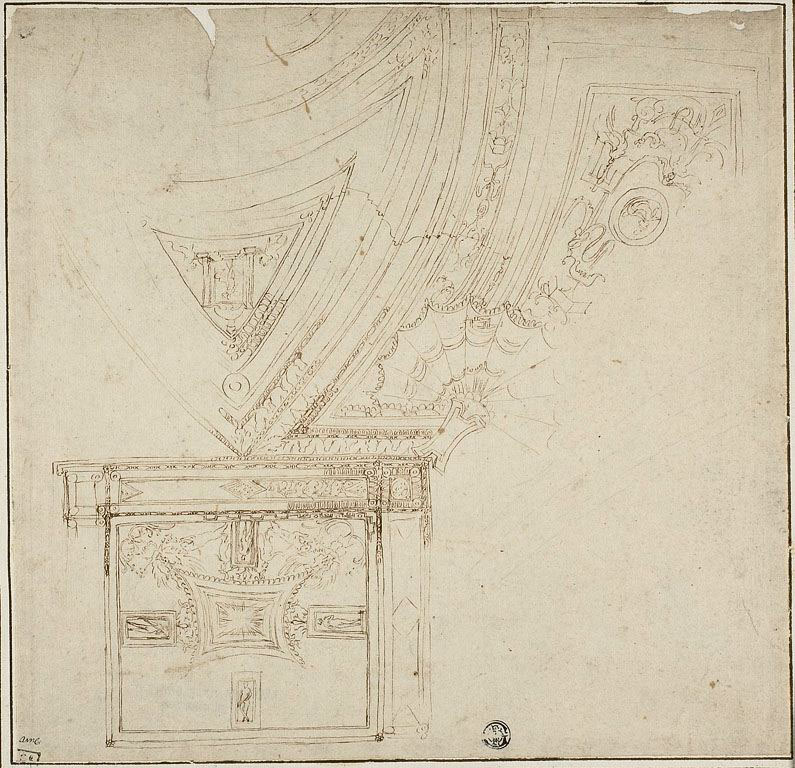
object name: Drawing and Watercolor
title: Ceiling Decoration with Grotesques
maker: Perino del Vaga, or circle of; Italian, 1501-1547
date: 1530/39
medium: Pen and brown ink, with traces of black chalk, on cream laid paper, edge mounted to ivory laid paper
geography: Italy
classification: pen and ink drawings; drawings (visual works); prints and drawing